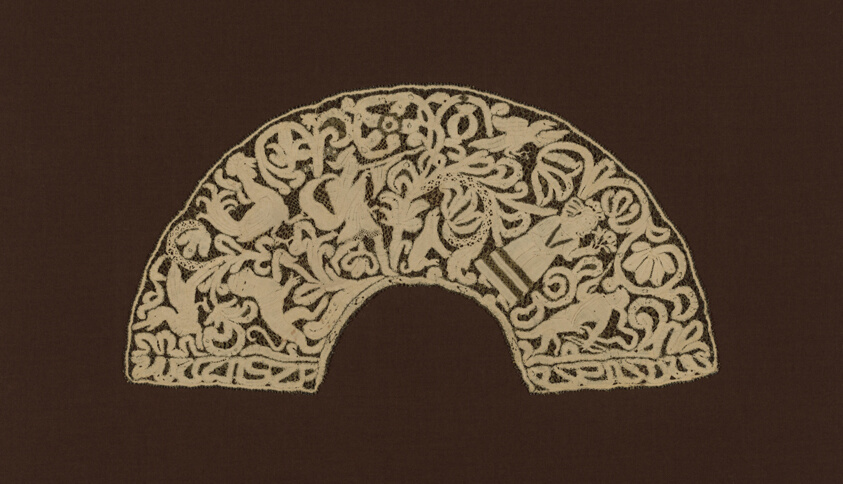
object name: Costume and Accessories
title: Fan Leaf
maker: Italy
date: 1725/50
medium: Linen and gilt-metal-strip-wrapped silk, bobbin part lace with some needle lace fillings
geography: Italy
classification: textile; lace - bobbin; fan - lace; lace - needle; costume